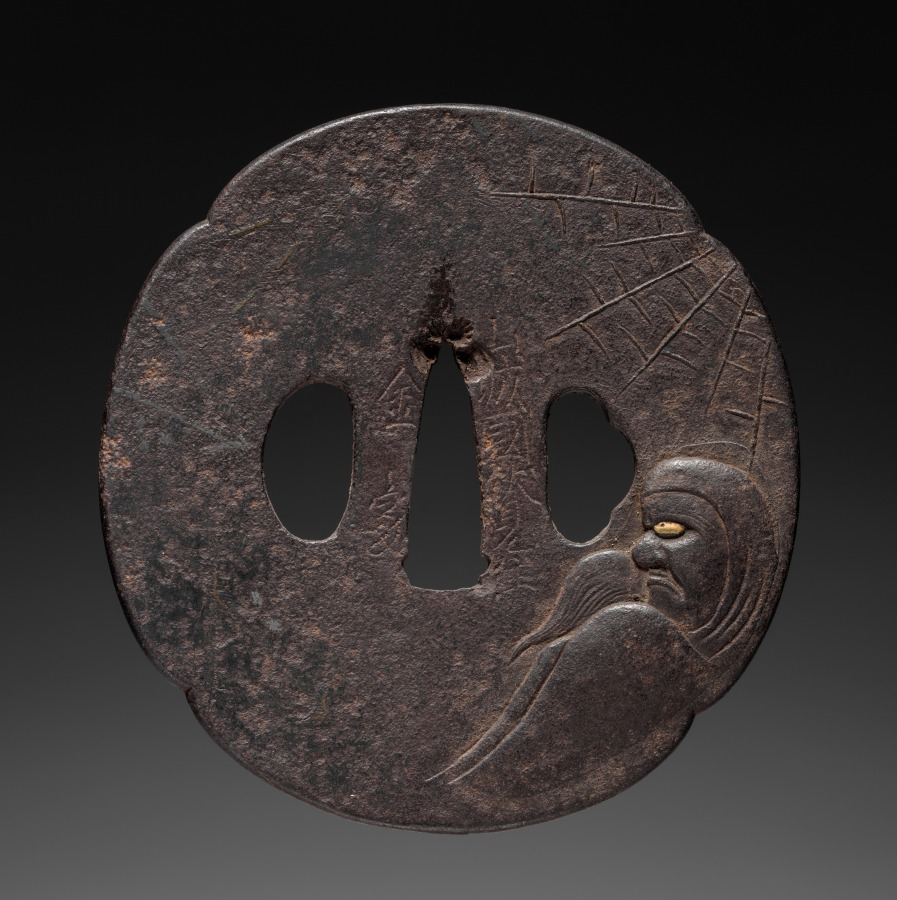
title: Sword Guard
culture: Japan, Edo period (1615–1868)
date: late 1600s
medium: iron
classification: Arms and Armor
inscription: Signature: Kaneiye residing at Fushimi, Yamashiro province